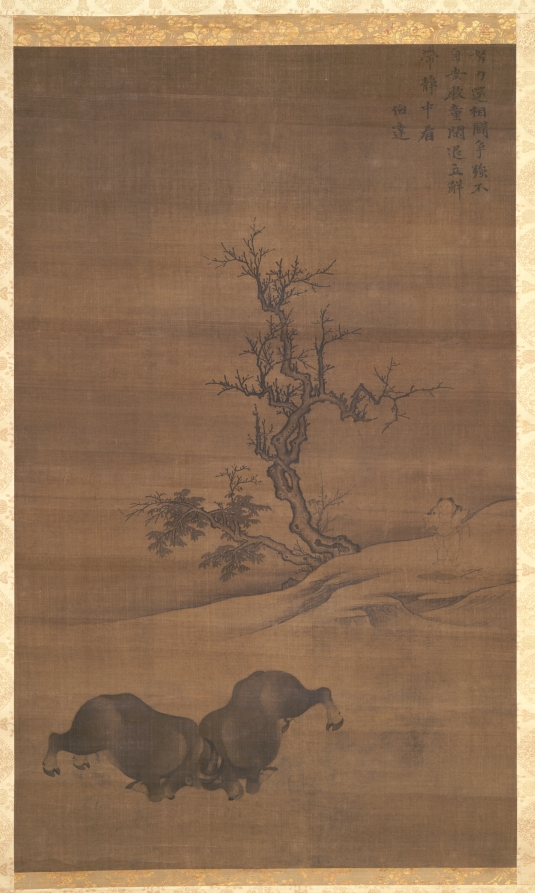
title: Herdboys and Buffalo in Landscape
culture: China, Qixian, Yuan dynasty (1271-1368)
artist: Guo Min (Chinese, mid-late 1200s)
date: 1200s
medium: Hanging scroll; ink on silk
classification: Painting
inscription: 努力還相鬪，爭強不自安。/ 牧童閑退立，解帶靜中看。/ 伯達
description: Herdboys tend their buffalo in a bucolic landscape by a winding stream. Guo Min emphasizes the massive forms and mighty power of the animals, transforming them into forces of nature. The poem on this scroll reads: "The bulls are engaging in fighting, Cautiously, each seeks to overcome the other. The herdboy calmly stands by. Untying his belt, he silently watches."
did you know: Tending water buffalos has traditionally been the task of young boys and can still be seen in rural areas of Southern China today.